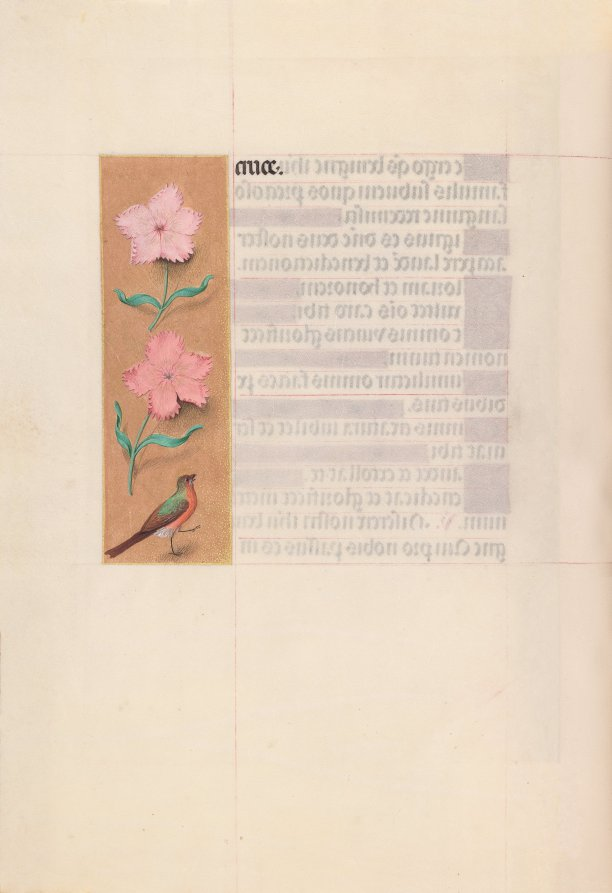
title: Hours of Queen Isabella the Catholic, Queen of Spain: Fol. 56v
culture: Flanders, Ghent and Bruges, late 15th century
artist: Master of the First Prayerbook of Maximillian (Flemish, c. 1444–1519)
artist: and Associates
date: c. 1500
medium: ink, tempera, and gold on vellum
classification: Bound Volume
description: This manuscript was illuminated by a circle of at least five highly organized manuscript painters active in the Flemish cities of Ghent and Bruges. The principal illuminator was Alexander Bening, who painted the majority of the book's miniatures. Manuscripts produced by this circle of artists are renowned for the decoration of their borders, which typically feature a rich variety of realistically-painted flowers, birds, and butterflies. This prayer book, called a book of hours, was intended not for a cleric, but for the private devotions of a lay person-in this case, Isabella the Catholic, Queen of Spain (1451-1504). Isabella's coat of arms embellishes the book's frontispiece. It is unlikely that the book was commissioned by the Queen herself; rather, she probably received it as a diplomatic gift from someone courting her patronage, perhaps Cardinal Francisco Jimenez de Cisneros. A Franciscan friar, Jimenez was dependent upon Isabella for his advancement, first to the post of Queen's confessor in 1492, and then to Archbishop of Toledo in 1495.